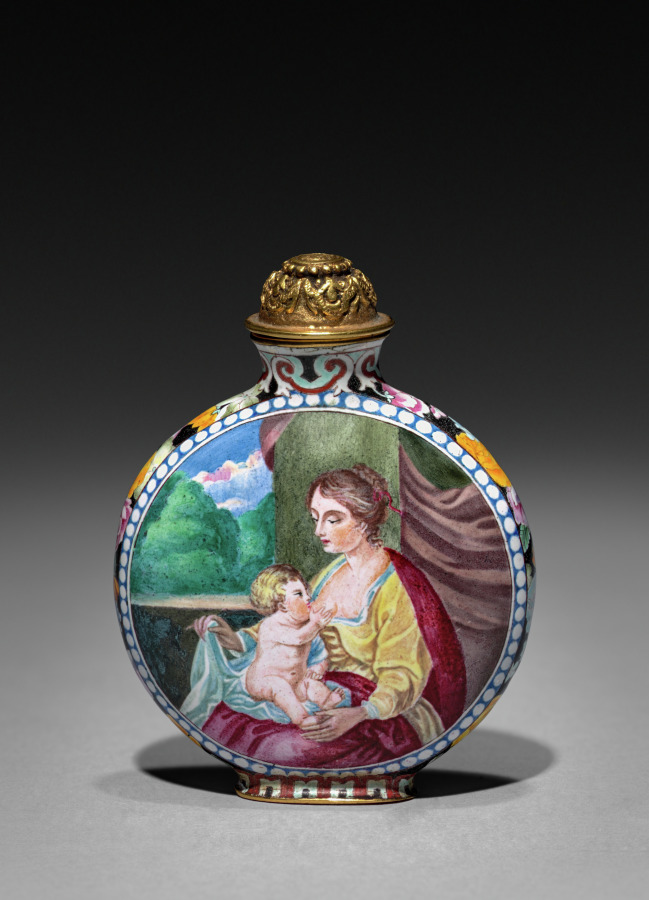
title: Snuff Bottle with European Figures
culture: China, Qing dynasty (1644-1911), Qianlong mark and reign (1736-95)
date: 1736–95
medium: painted enamel on copper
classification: Enamel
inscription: 乾隆年製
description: Snuff bottles were introduced from Europe to China around the 1700s to hold portable snuff or medicine.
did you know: The stopper is decorated with bats, which traditionally symbolize good luck, since both words (蝠 and 福) are both pronounced as fu in Chinese.